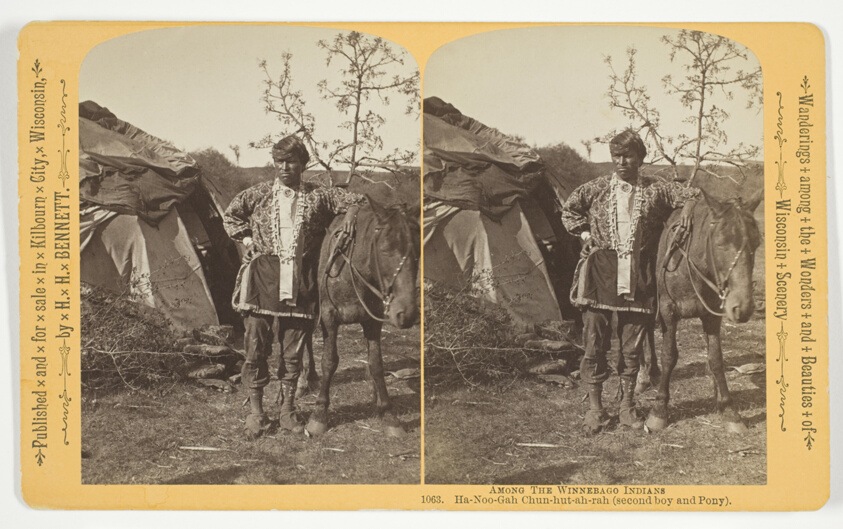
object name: Photograph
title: Ha-Noo-Gah Chun-hut-ah-rah (second boy and Pony), No. 414 from the series "Among the Winnebago Indians"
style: 19th century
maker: Henry Hamilton Bennett (American, born Canada, 1843-1908)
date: 1870/1908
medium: Albumen print, stereo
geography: Wisconsin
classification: photography; photograph; albumen silver print; stereograph (albumen)